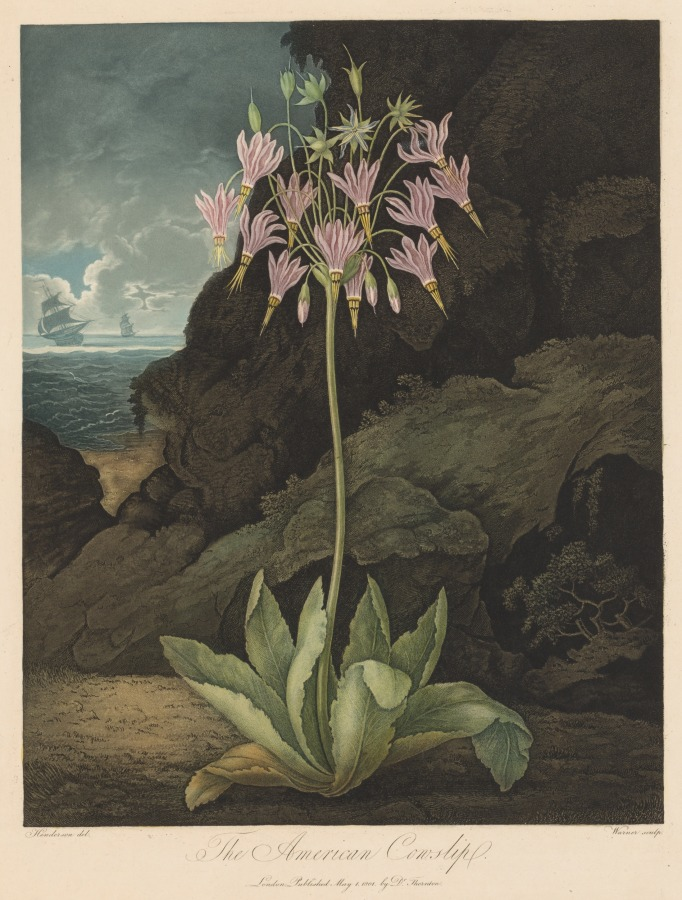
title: The American Cowslip, Plate 26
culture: England, late 18th-early 19th Century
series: The Temple of Flora; or Garden of Nature. Picturesque Botanical Plates of the New Illustration of the Sexual System of Linnaeus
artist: Thomas Warner (English, active 1790–1828)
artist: after Peter Charles Henderson (British, 1771–1829)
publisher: Robert John Thornton (British, 1768–1837)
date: 1801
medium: Etching with printed and hand-applied color, aquatint, stipple, and engraving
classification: Print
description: Fueled by scientific and colonial expeditions that brought back plant specimens from across the globe, the science of botany blossomed in Enlightenment Europe. This print is from a sumptuously illustrated treatise known as The Temple of Flora. Commissioned and published by Dr. Robert John Thornton, a British medical botanist, the work illustrates the new plant classification system of Swedish scientist Carl Linnaeus. Yet while these prints realistically depict buds, flowers, and leaves, they show them in environments where they did not actually grow. Instead, Thornton had the artists situate specimens in imagined landscapes, often reminiscent of British colonial holdings, which he felt better suited the plants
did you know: Each plant in The Temple of Flora was paired with a scientific description of its reproductive system and a poem.